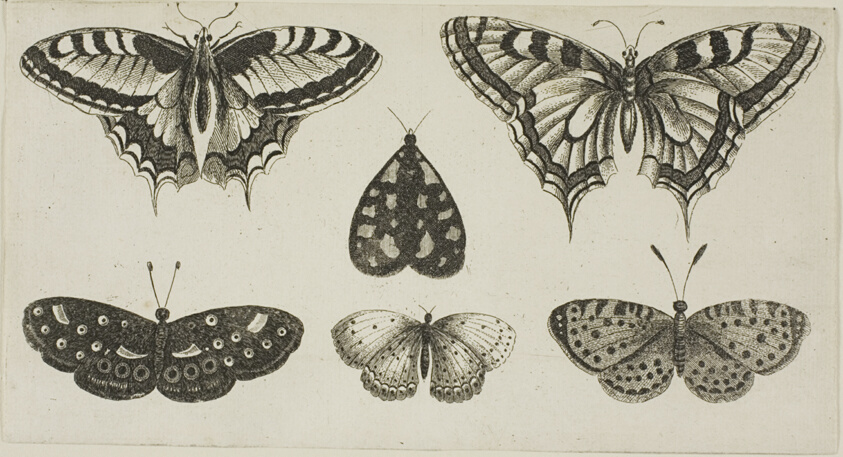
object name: Print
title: Five Butterflies and a Moth, from Diversae Insectorum...Figurae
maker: Wenceslaus Hollar (Bohemian, 1607-1677)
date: after 1644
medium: Etching on ivory laid paper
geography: Bohemia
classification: etching; print; prints and drawing